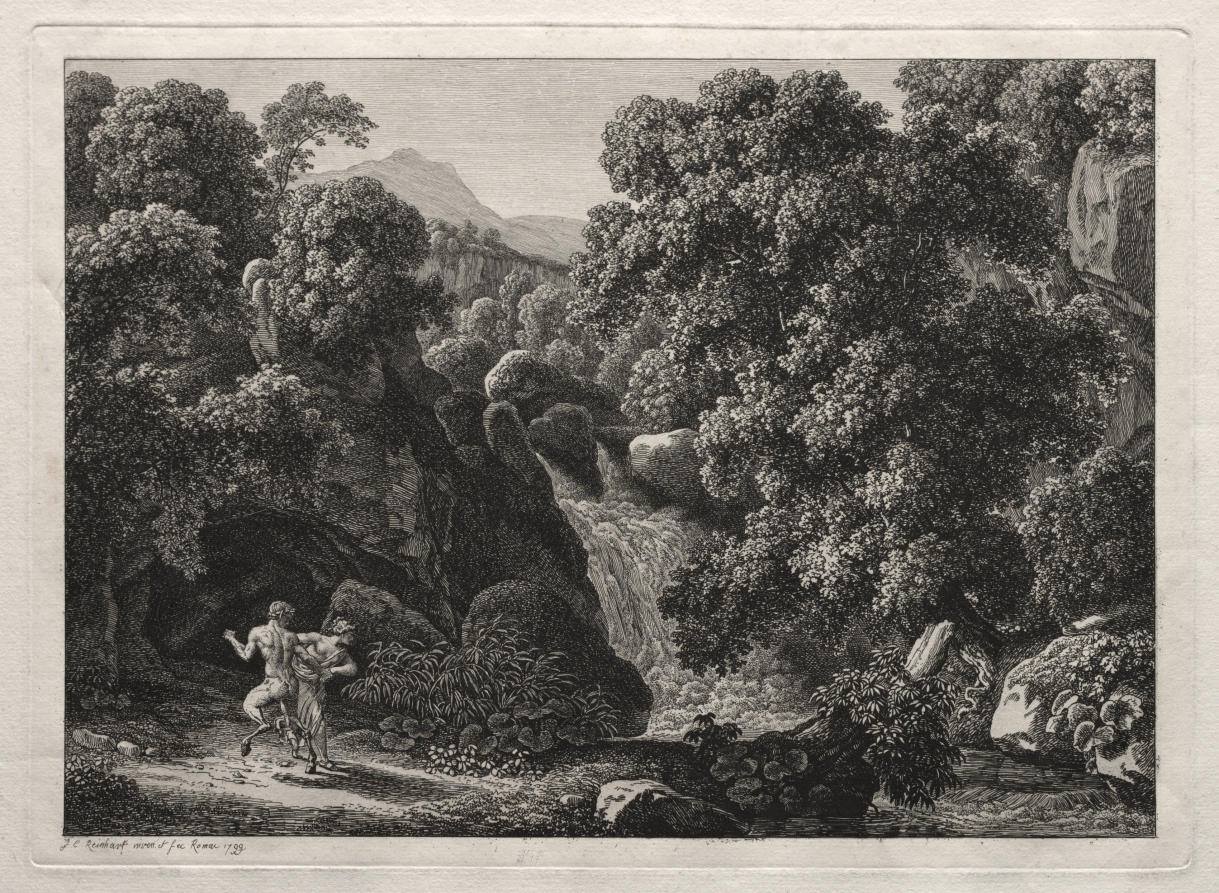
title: Heroic Landscape: The Satyr and the Nymph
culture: Germany, 19th century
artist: Johann Christian Reinhart (German, 1761–1847)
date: 1799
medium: etching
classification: Print